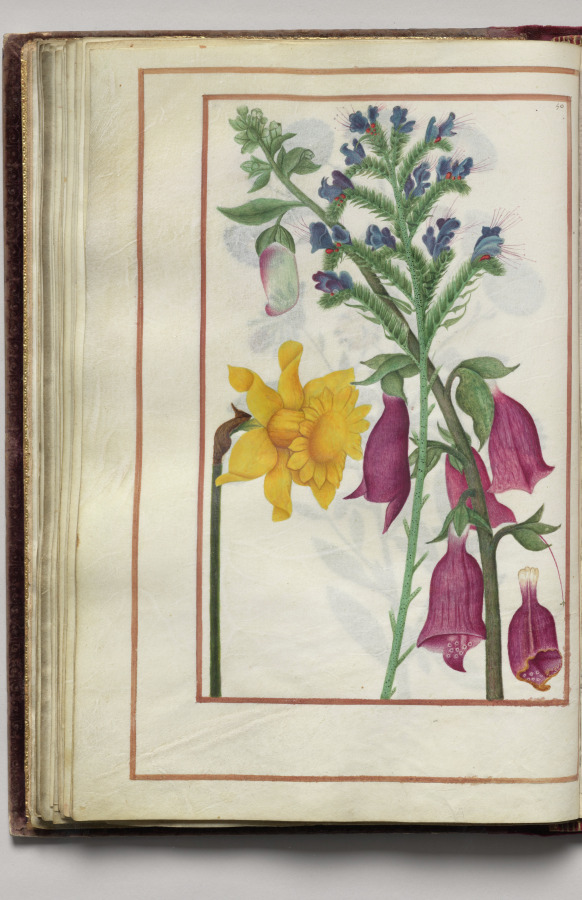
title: Yellow Narcissus, Blue Bugloss, and Foxglove, folio 25 (verso), from Florilegium (A Book of Flower Studies)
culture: France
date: 1608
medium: watercolor, ink, silver, and gold over occasional traces of pencil, on vellum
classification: Bound Volume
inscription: Dated: Poitiers 1608 (on frontispiece) Signed: On frontispiece in black ink, lower right: Van Kuyk Notation on drawing: Frontispiece: in pencil, lower margin: * élève de Van Kessel, peintre flammand (* in pencil also appears in front of Van Kuyk's name).